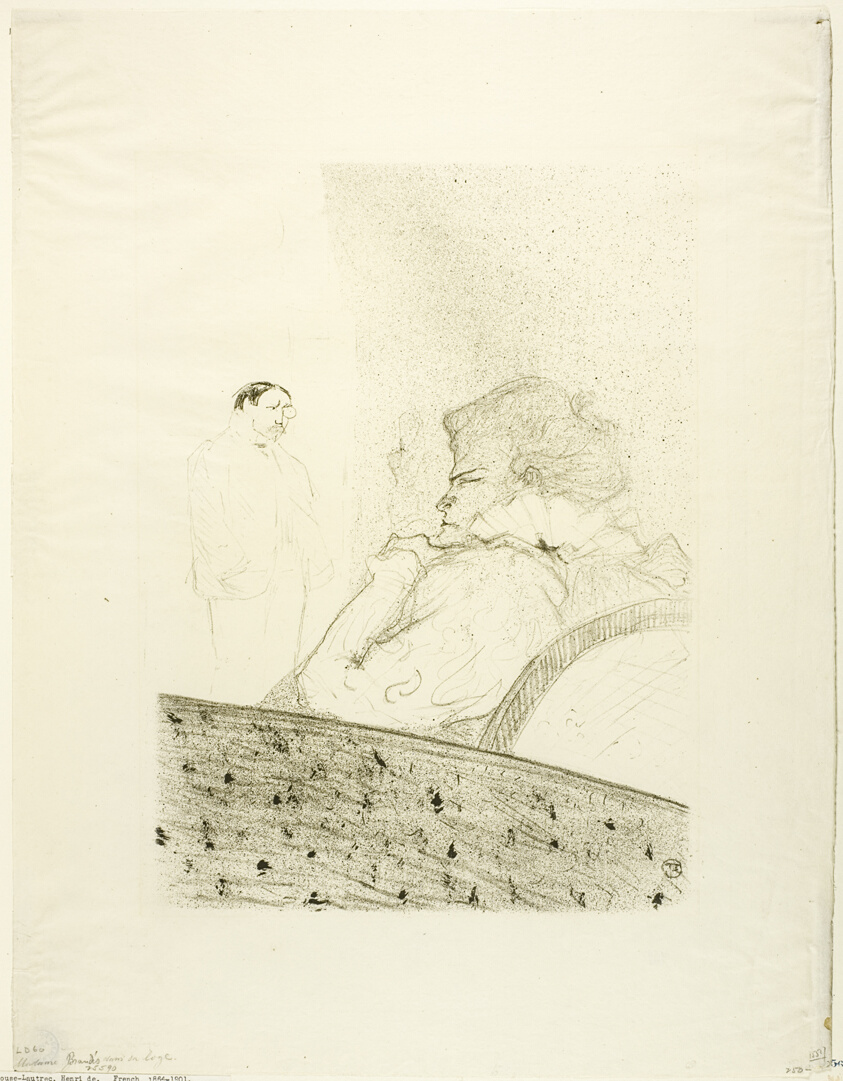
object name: Print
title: Brandès in her Box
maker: Henri de Toulouse-Lautrec (French, 1864-1901)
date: 1894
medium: Color lithograph on ivory wove paper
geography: France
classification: lithograph; print; prints and drawing